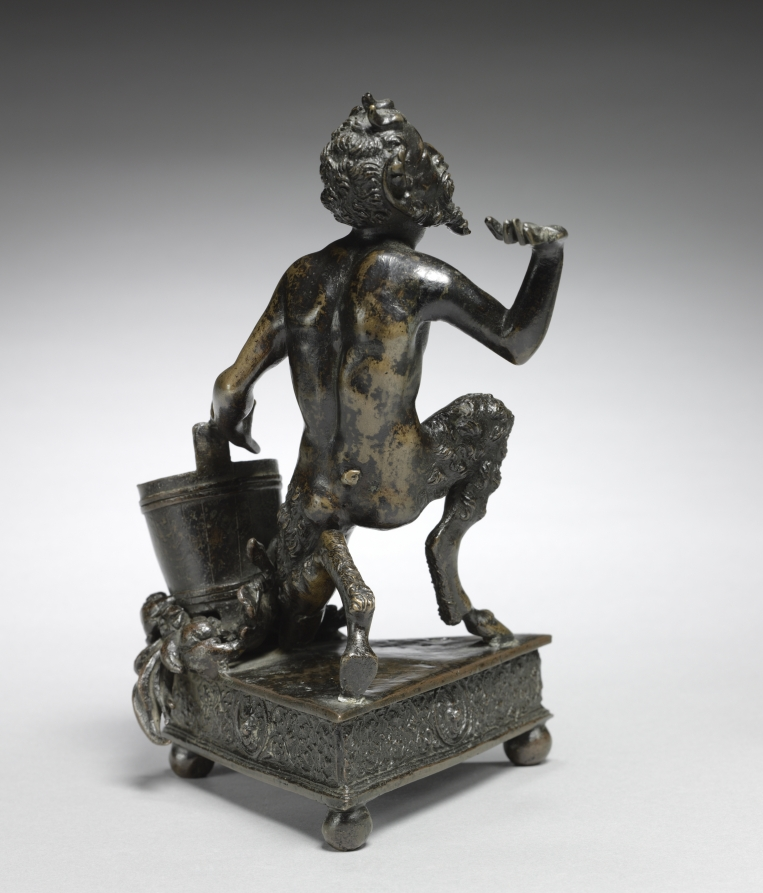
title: Kneeling Satyr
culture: Italy, Ravenna, 16th century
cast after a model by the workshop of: Severo da Ravenna (Italian, c.1496–c.1543)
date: c. 1520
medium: bronze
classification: Sculpture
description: Greek and Roman art and literature typically used satyrs as a form of grotesque comic relief, but Renaissance artists adopted them as jovial celebratory figures of nature and revelry.